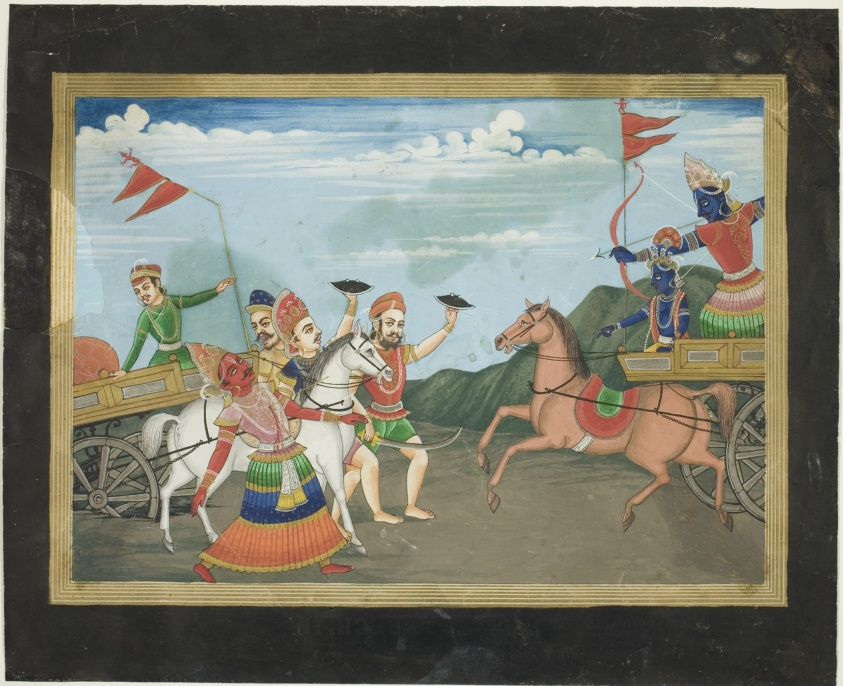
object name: Painting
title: Arjuna Slays Karna, page from a Mahabharata series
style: Himalayan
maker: Nepal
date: c. 19th century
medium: Opaque watercolor on paper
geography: Nepal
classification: watercolor; painting